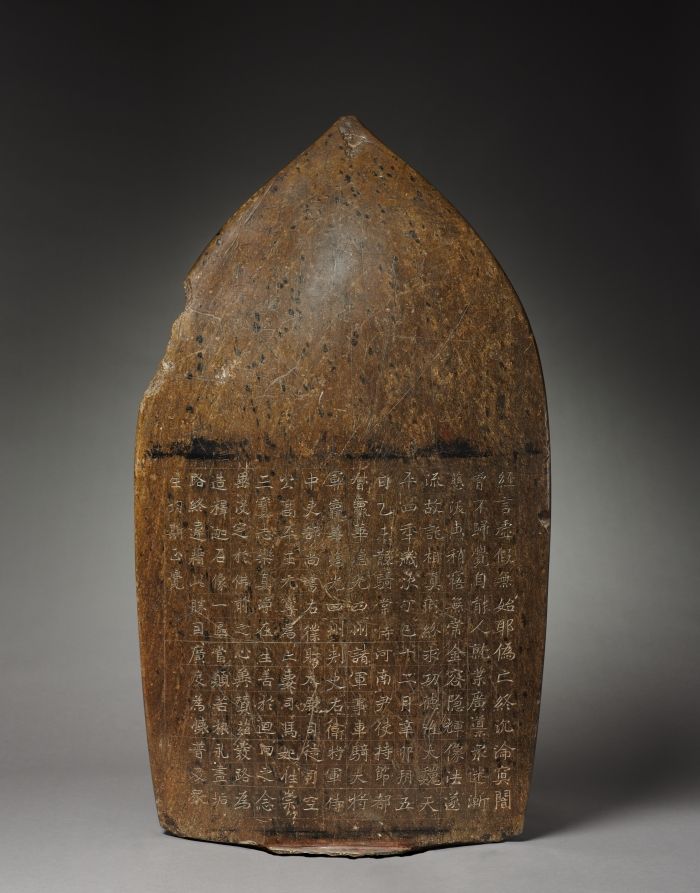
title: Stele with Sakyamuni and Bodhisattvas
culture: China, Hebei province, Eastern Wei dynasty (534-550)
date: 537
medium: limestone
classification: Sculpture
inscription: Fully inscribed on reverse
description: According to the inscription, this stele was commissioned in 537 by Yuan'ning, prince of the Gaoping branch of the imperial Wei family, in memory of his deceased consort, in the hope that it would bring her to the Western paradise. It was carved by one of the finest craftsmen in the Eastern Wei capital of Ye in Hebei province. Here, the Buddha's robe shows a careful arrangement of patterned drapery (large U-shaped folds and scallop-shaped folds at the hem), combining linear rhythms with an ordered symmetry. Soaring flames edge the mandorla (almond-shaped halo), echoing the linear eloquence of Chinese painting.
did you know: Traces of polychrome paints remaining in the interstices of the carving, particularly on the foliate carving around Shakyamuni, suggest the stele was originally brightly colored.